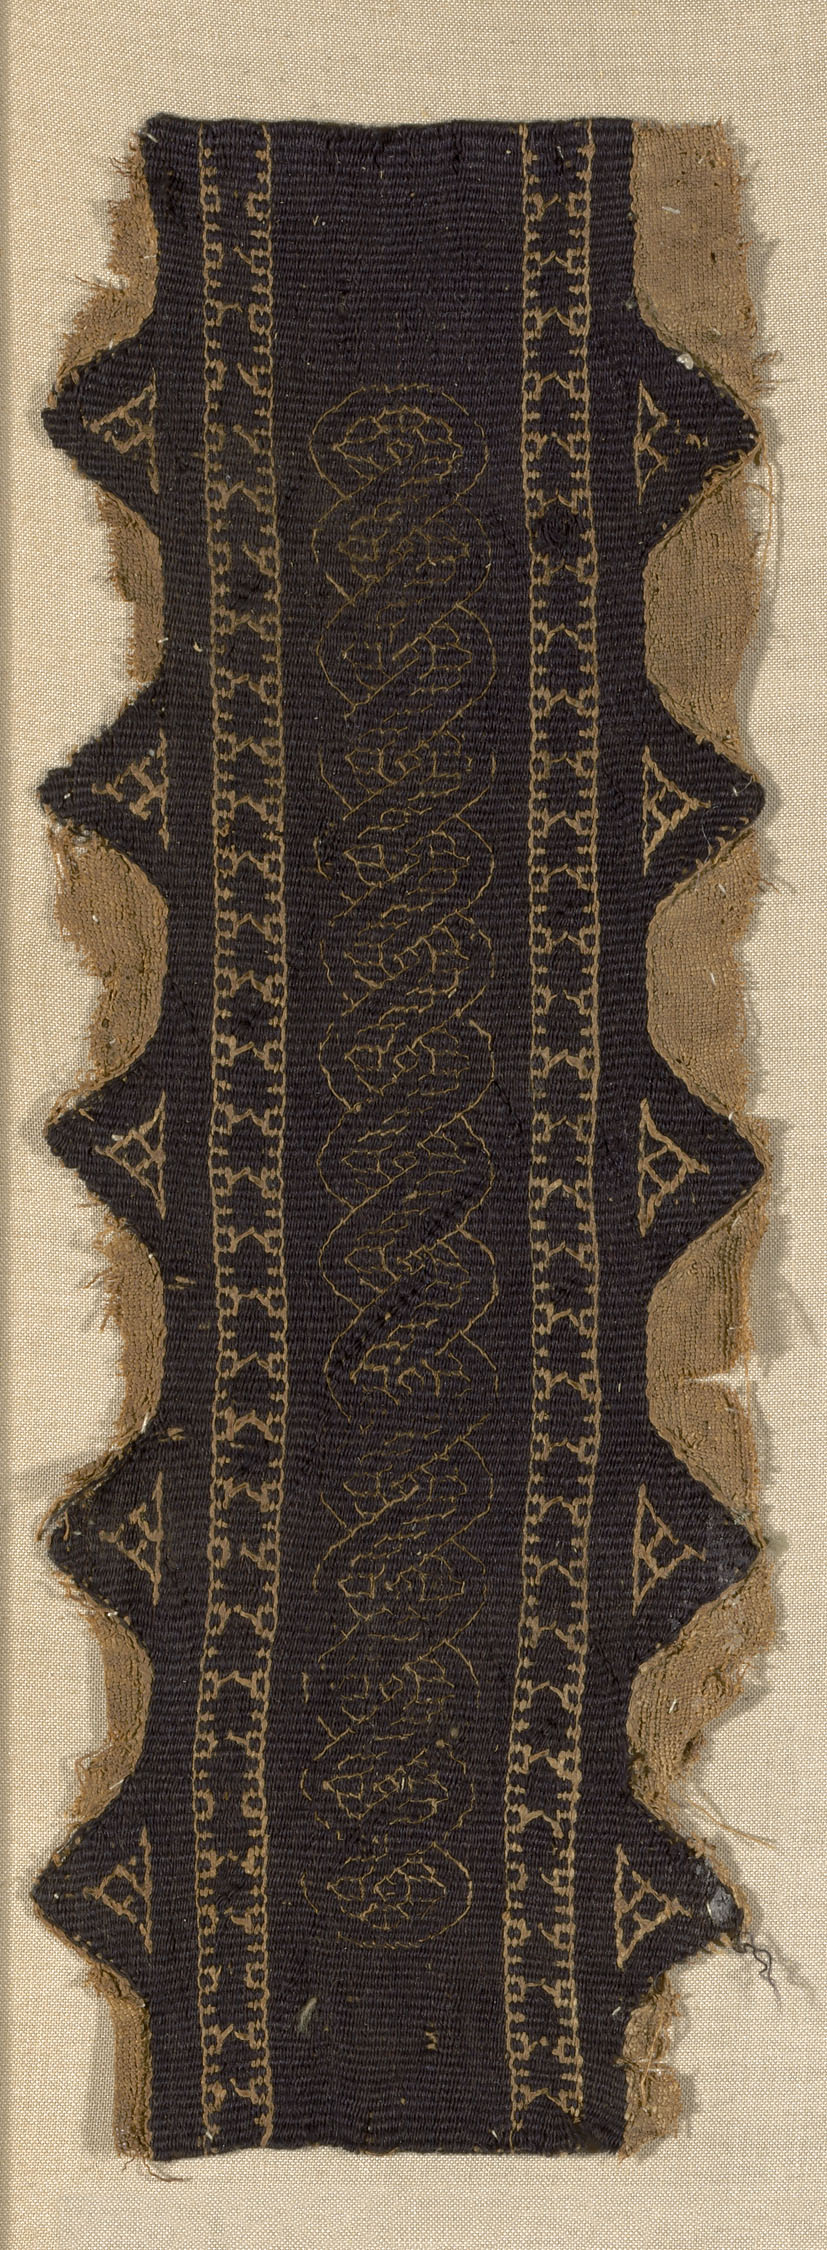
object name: Textile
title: Border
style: roman period (egyptian)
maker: Egypt, Akhmin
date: Roman period (30 B.C.– 641 A.D.), 5th/6th century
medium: Linen and wool, slit tapestry weave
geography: Egypt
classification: textile; weaving